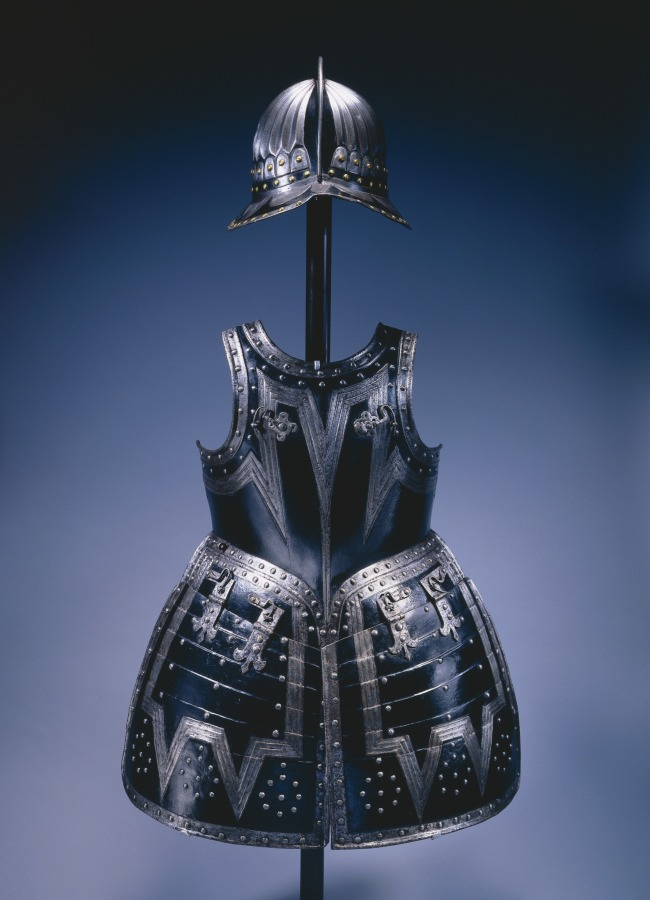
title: Pikeman’s Armor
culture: Netherlands, Dutch or Flemish, 17th century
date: c. 1620–30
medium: steel with brass rivets and black paint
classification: Arms and Armor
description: Pikemen formed the backbone of infantry tactics through the end of the English Civil Wars (1642–51). Since muskets alone were ineffective against cavalry charges, companies of pikemen, armed with pikes, or spears, of 12 to 16 feet in length, were deployed in defensive formations to protect the musketeers, who wore no armor. A pikeman was usually equipped with a breastplate and backplate, hinged tassets reaching to mid-thigh, and sometimes a gorget, or neck piece, worn over a heavy buffcoat. High boots replaced leg armor. A brimmed, high-combed helmet known as a "pot" protected the head. Pikeman's armor withstood hard service. It was colored and treated (though the black paint seen here is modern) to control rusting and to add decorative interest.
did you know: With its chevron decoration, this armor is slightly more decorative than most pikeman, suggesting that an officer could have owned it.